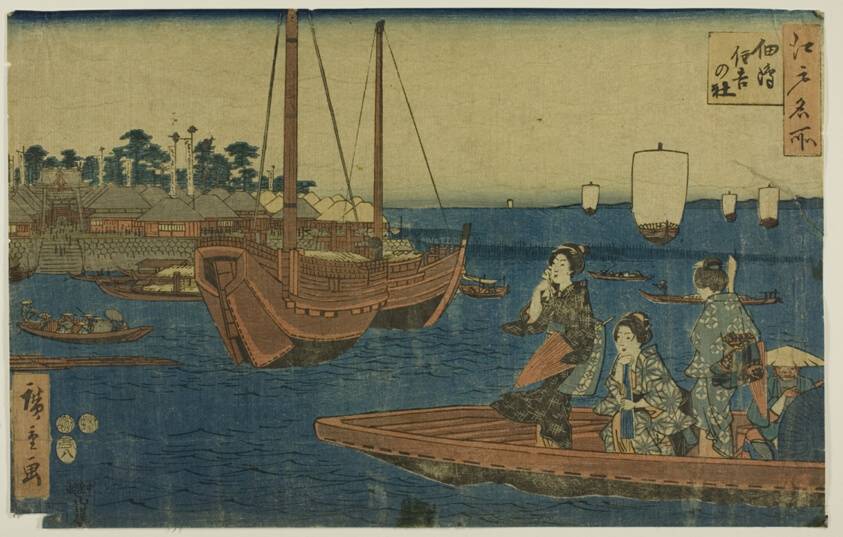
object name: Print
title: Woodblock Print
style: Japanese (culture or style)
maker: Utagawa Hiroshige 歌川 広重; Japanese, 1797–1858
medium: Color woodblock print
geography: Japan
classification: woodblock print; print